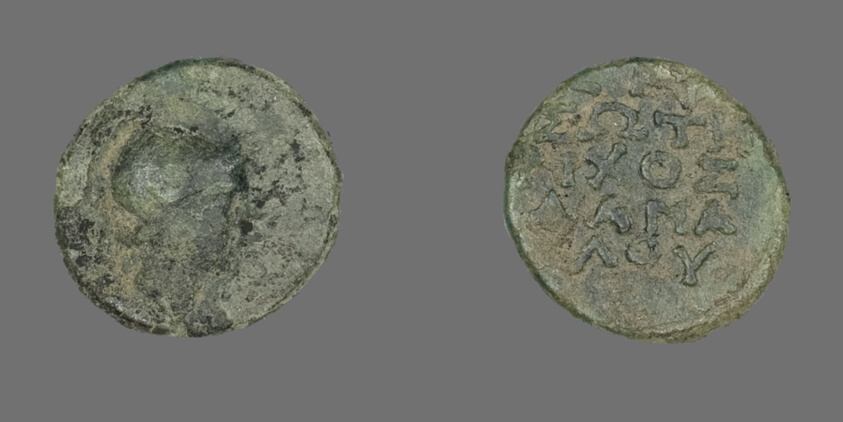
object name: Coin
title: Coin Depicting the Goddess Athena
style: greek, ancient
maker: Greek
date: about 300-200 BCE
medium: Bronze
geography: Ancient Greece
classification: coin; ancient art